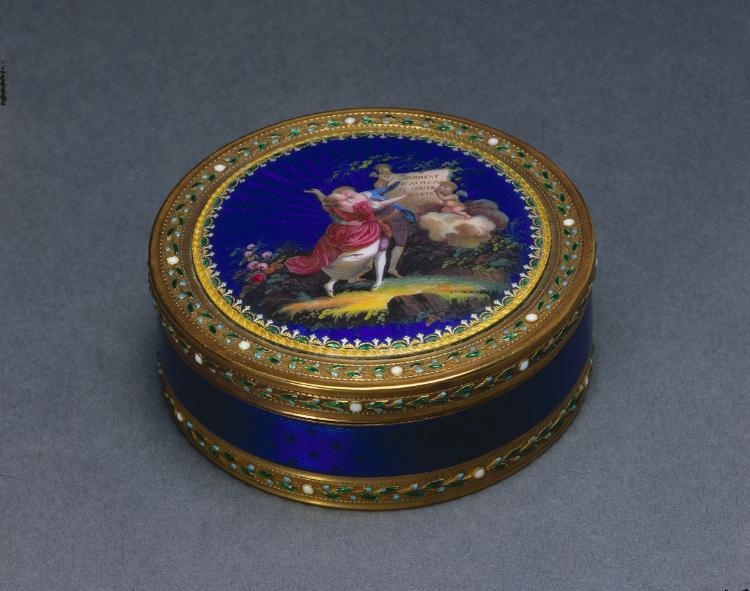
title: Box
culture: France, 18th century (style of Louis XVI)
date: 1700s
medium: gold and enamel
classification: Enamel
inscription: cupids holding book inscribed: Serment d'amour t-outs la vie.